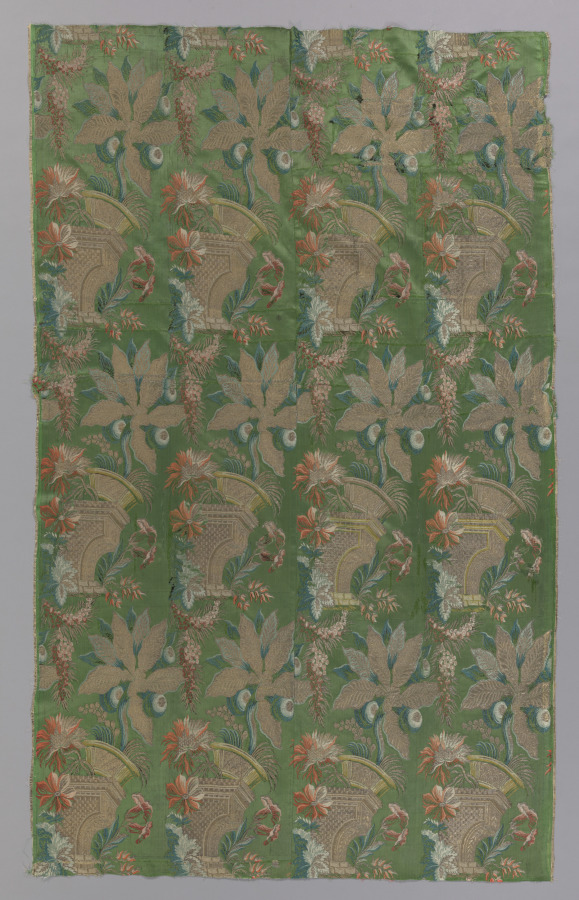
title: Silk Brocade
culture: Italy, Venice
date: late 1600s - early 1700s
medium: brocade; silk and metal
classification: Textile